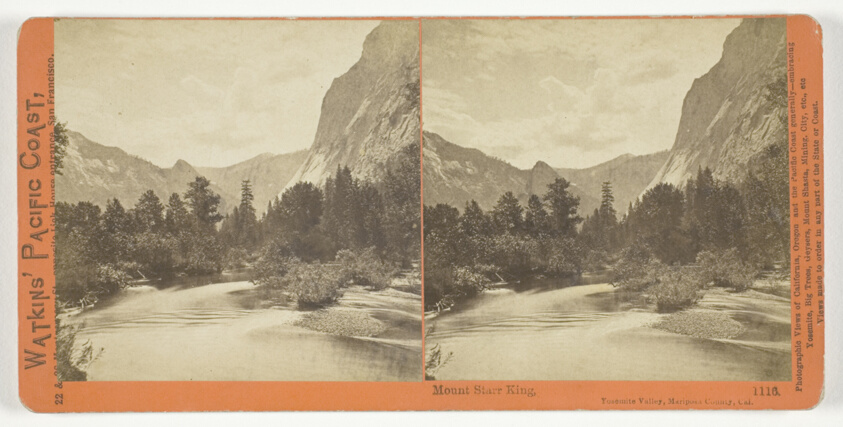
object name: Photograph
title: Mount Starr King, Yosemite Valley, Mariposa County, Cal., No. 1116 from the series "Watkins' Pacific Coast"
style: 19th century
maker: Carleton E. Watkins; American, 1829-1916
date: 1861/76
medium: Albumen print, stereo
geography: United States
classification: stereograph (albumen); albumen silver print; photographic process; photography; photograph